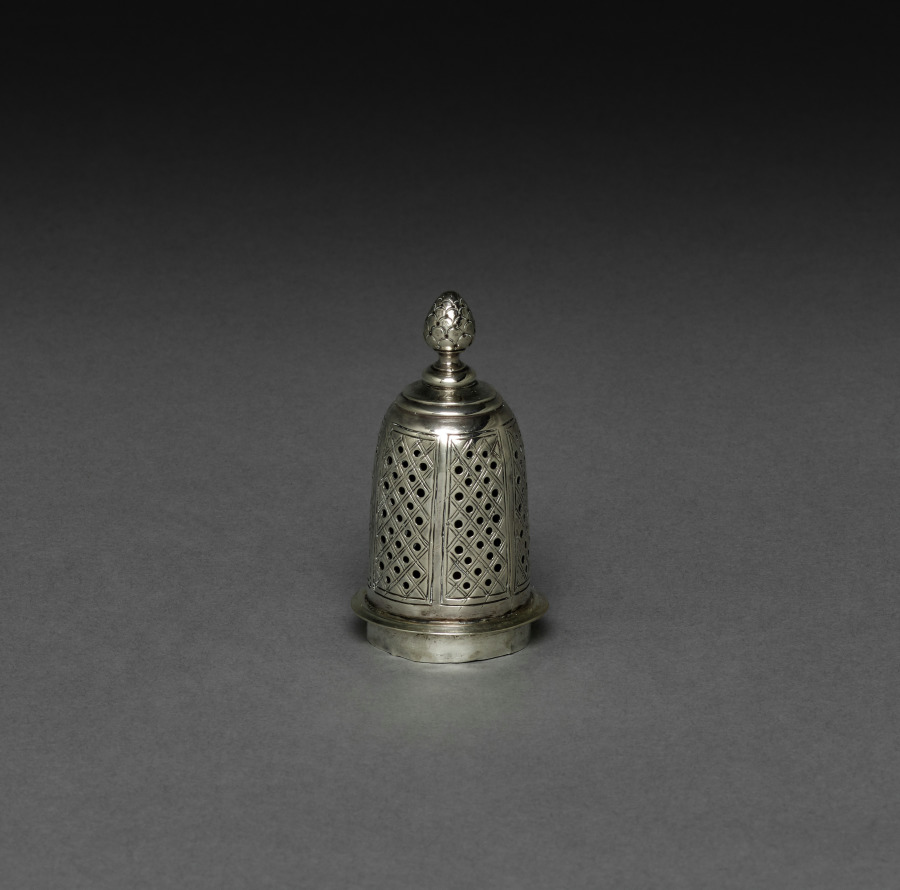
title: Caster (lid)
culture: America, Massachusetts, Salem, 18th century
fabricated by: John Andrew (American, 1747–1791)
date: c. 1770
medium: silver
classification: Silver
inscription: Engraved underside of base: "C * S"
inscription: Stamped on side of vessel: "Andrew"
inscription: Scratched underside of base: "3-10"